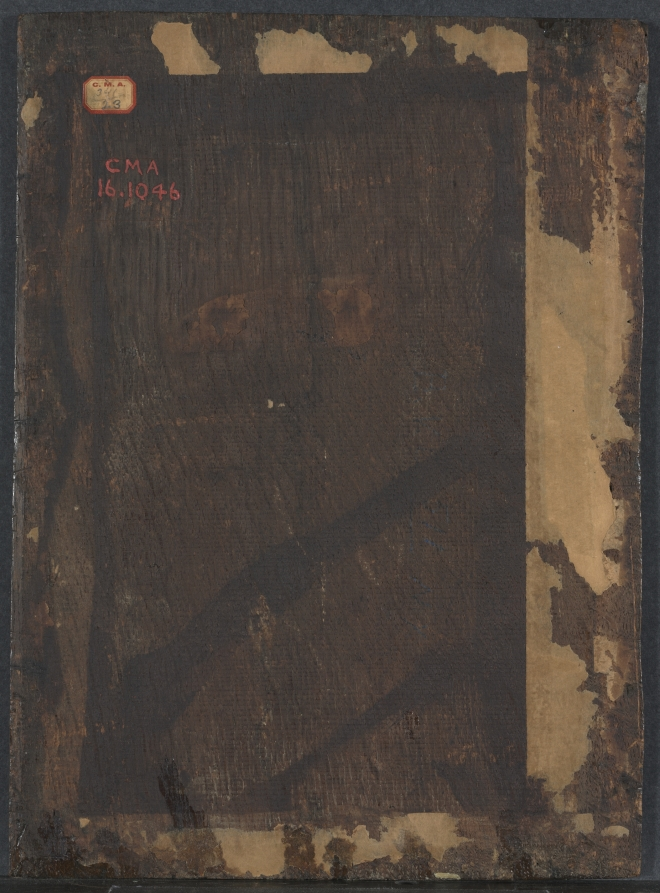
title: Peasants Smoking in an Inn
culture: Flanders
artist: David Teniers (Flemish, 1610–1690)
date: c. 1640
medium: oil on wood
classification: Painting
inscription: signed lower left: D. TENIERS. FEC.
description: David Teniers the Younger was a popular artist who specialized in small paintings of rustic Flemish life in the 1600s. In works such as Peasants Smoking in an Inn, an older man and a younger man in the foreground smoke tobacco. The younger man rests limply against the wall and his head lolls back, a gesture that symbolized that he had overindulged in smoke. Another standing man prepares his pipe and watches the younger man with amusement. Tobacco was a novelty in the 1600s, introduced from the Americas and East Indies with other new imports such as sugar cane and rice, and was believed to be a medicinal product. It was particularly recommended for people who lived in "waterish places" such as Antwerp, the capital of Flanders, where Teniers painted this scene. Although many medical practitioners believed tobacco to be a cure for numerous ailments, moral opponents to smoking criticized it as a danger to health and morals. The mixed reputation and widespread popularity of tobacco smoking thus made it a marketable and amusing subject for Flemish artists such as Teniers.